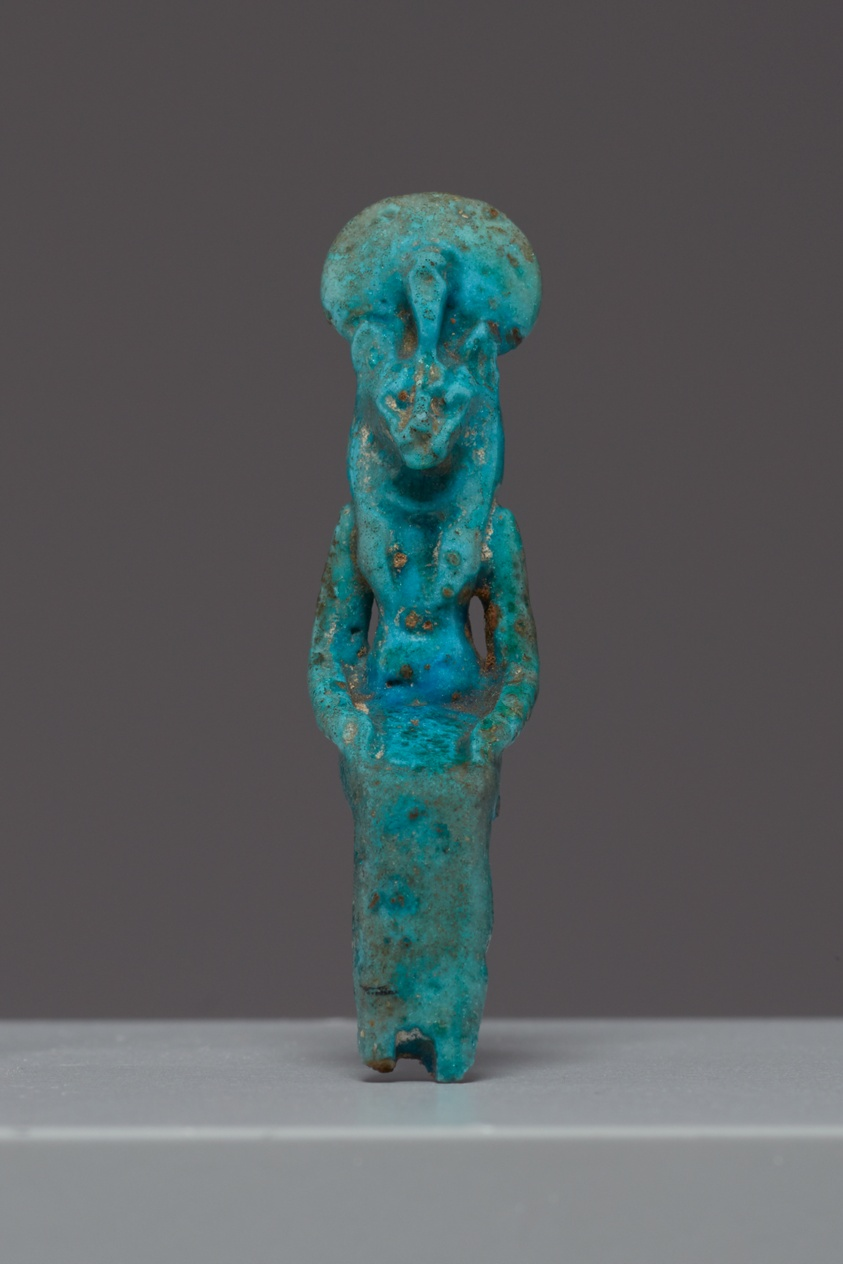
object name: Costume and Accessories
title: Amulet of the Seated Goddess Sekhmet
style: egyptian, ancient, new kingdom, third intermediate period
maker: Egyptian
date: New Kingdom–Third Intermediate Period (about 1050–664 BCE)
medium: Ceramic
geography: Egypt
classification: amulet; ceramics; jewelry; ancient art; costume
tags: goddesses, lions